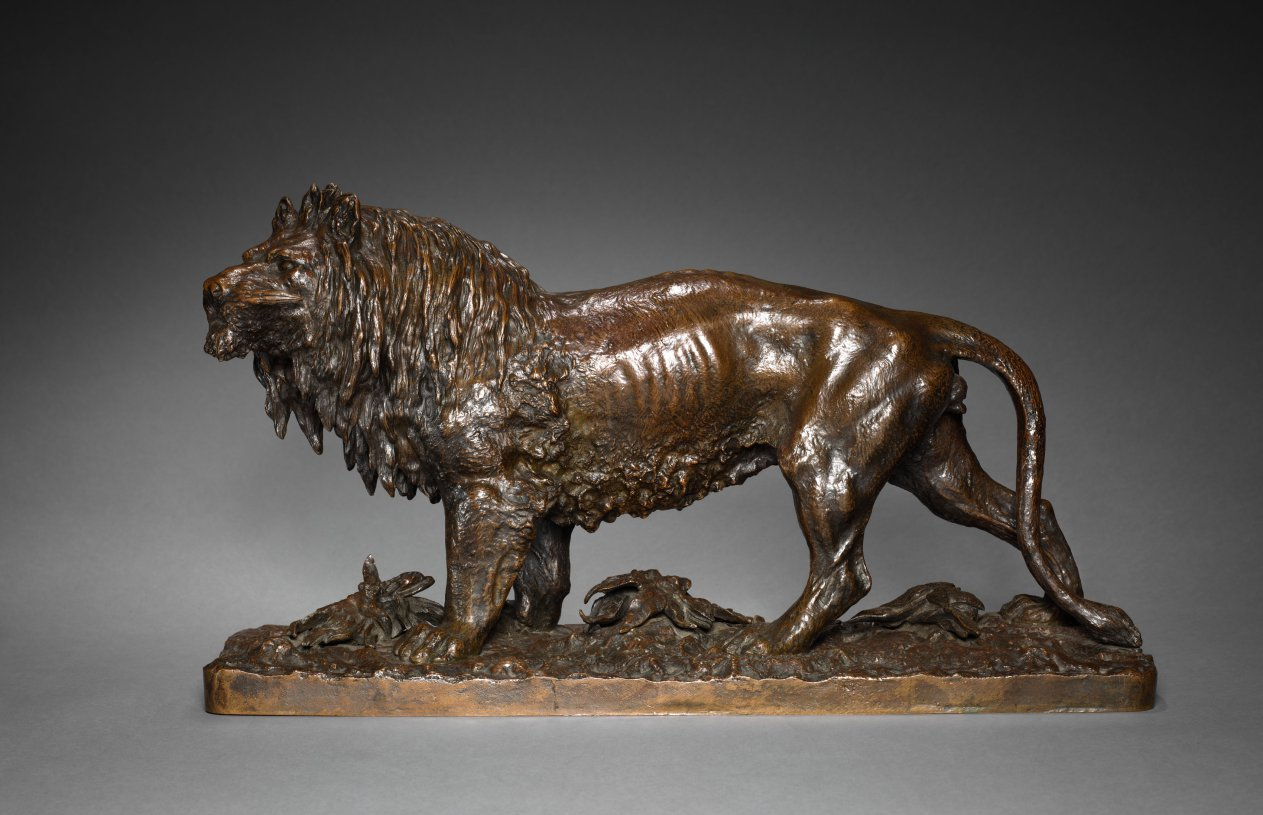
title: Standing Lion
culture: France, 19th century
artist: Christophe Fratin (French, 1801–1864)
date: c. 1837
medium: bronze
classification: Sculpture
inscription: Signed near clump of foliage beneath lion: "Fratin"